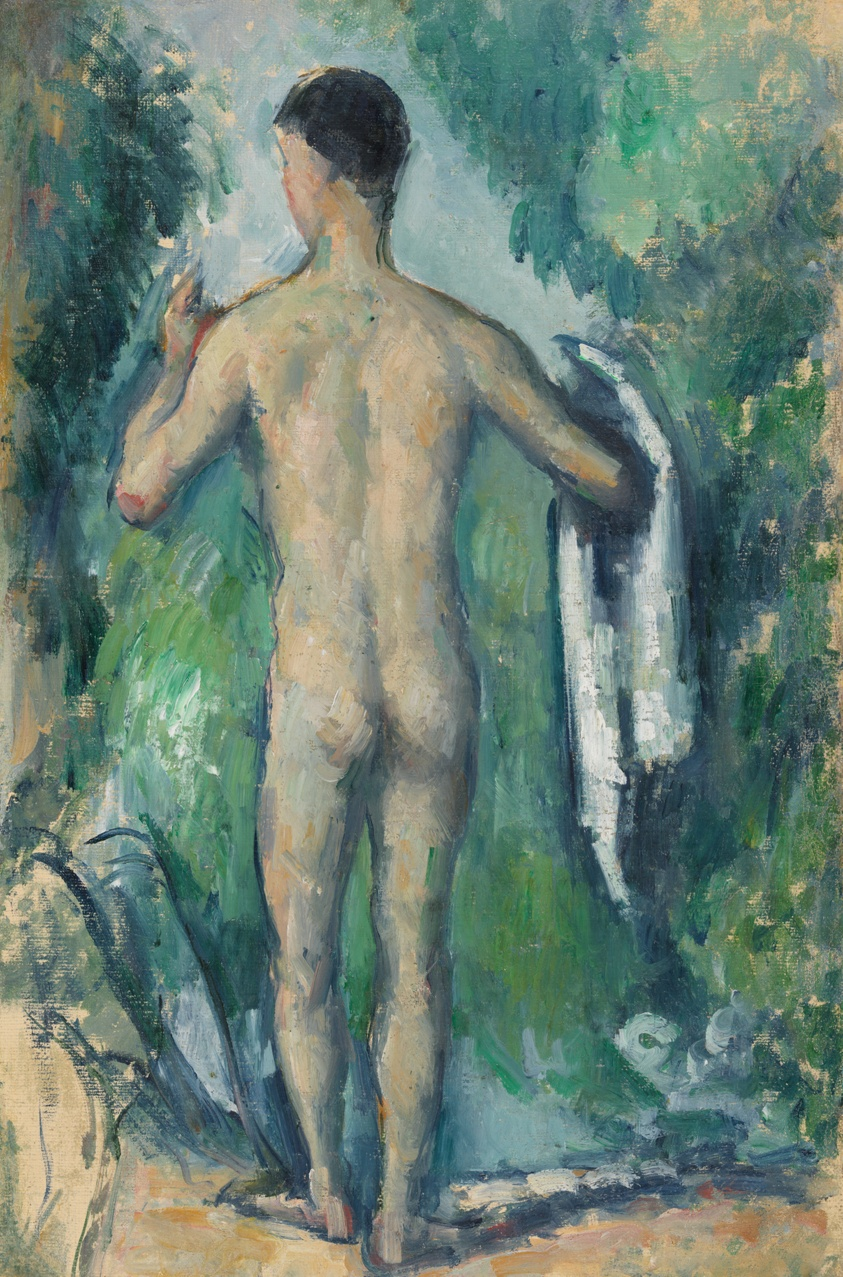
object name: Painting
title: Standing Bather, Seen from the Back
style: 19th century, Impressionism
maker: Paul Cezanne (French, 1839–1906)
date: 1879-82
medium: Oil on canvas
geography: France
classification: painting; european painting; french; oil on canvas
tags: nudes, rocks, bathers, trees, foliage, landscape, man, Male